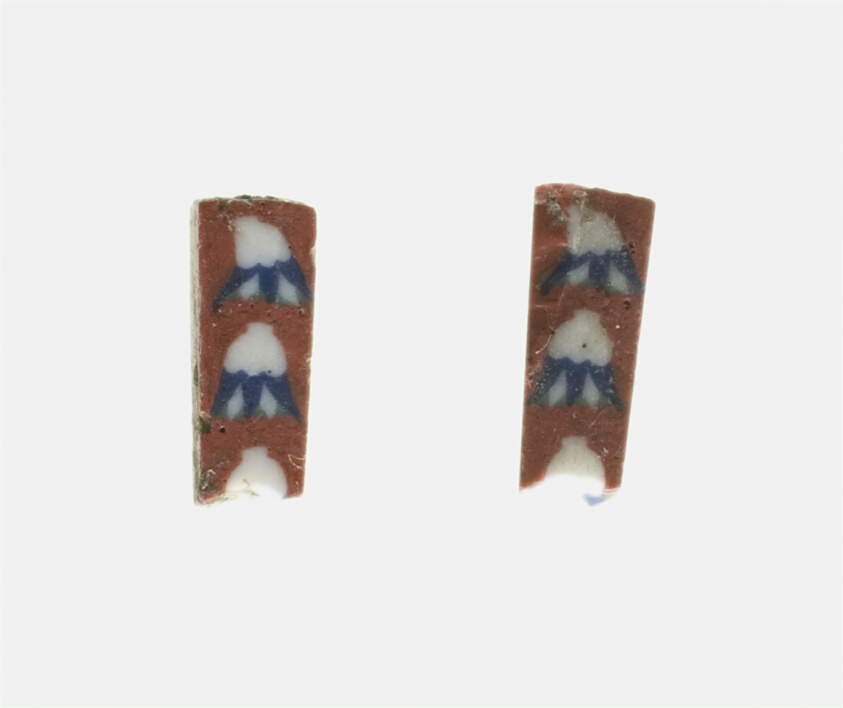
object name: Decorative Arts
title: Fragments of Inlays Depicting Lotus Buds (?)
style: roman (ancient, style or period), ancient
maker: Roman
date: 1st century BCE–1st century CE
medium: Glass, mosaic glass technique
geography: Italy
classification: glass; inlay; ancient art; decorative arts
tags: decoration